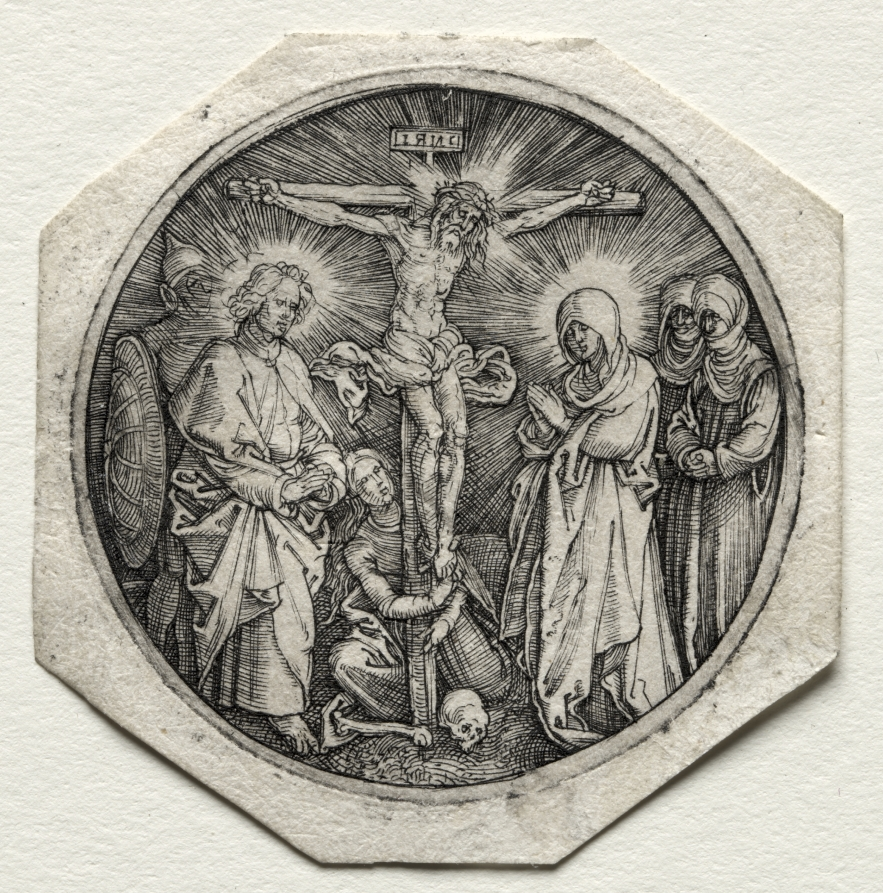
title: The Crucifixion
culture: Germany, late 15th-early 16th century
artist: Albrecht Dürer (German, 1471–1528)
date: c. 1518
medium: engraving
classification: Print